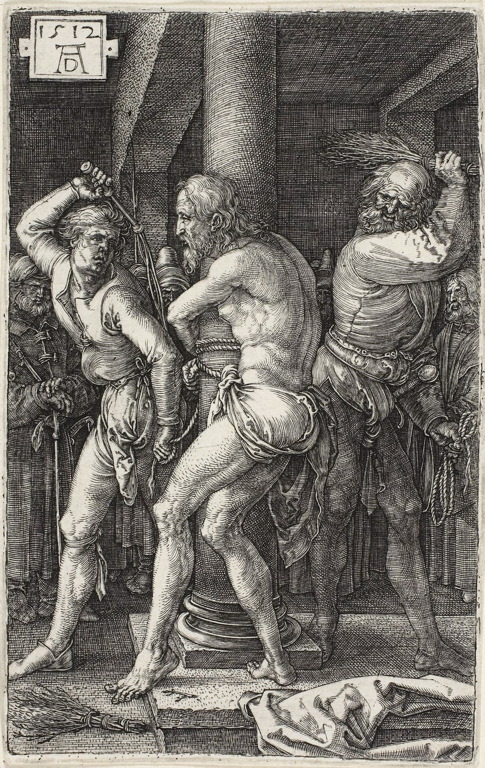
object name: Print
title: Flagellation, from The Engraved Passion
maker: Albrecht Dürer (German, 1471-1528)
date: 1512, published 1513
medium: Engraving in black on ivory laid paper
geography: Germany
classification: engraving; print; prints and drawing; paper